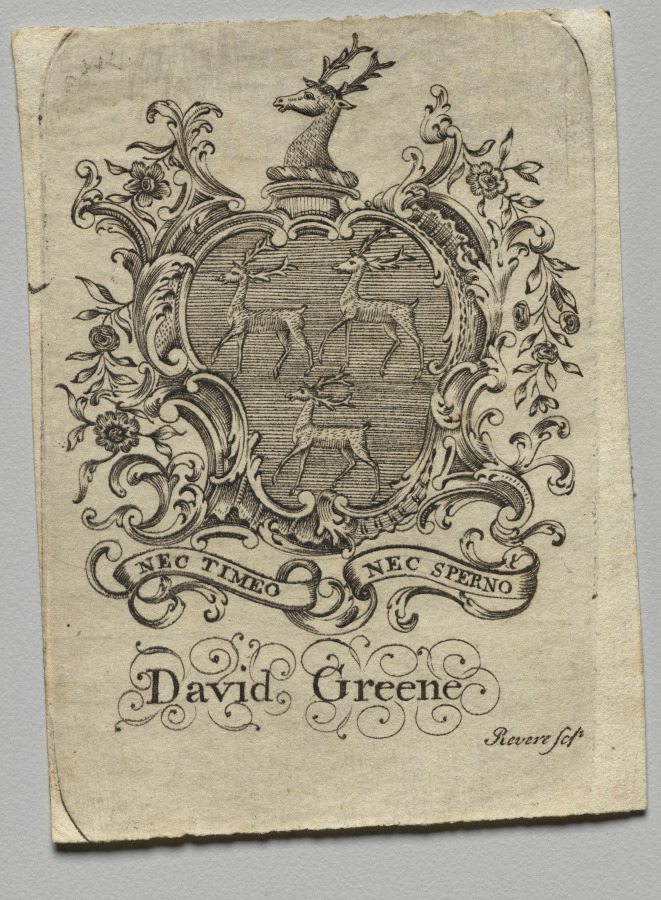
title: Bookplate: Coat of Arms with David Greene inscribed below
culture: America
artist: Paul Revere II (American, 1735–1818)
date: c. 1750–1818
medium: engraving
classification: Print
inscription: Signed: "Revere, scp"